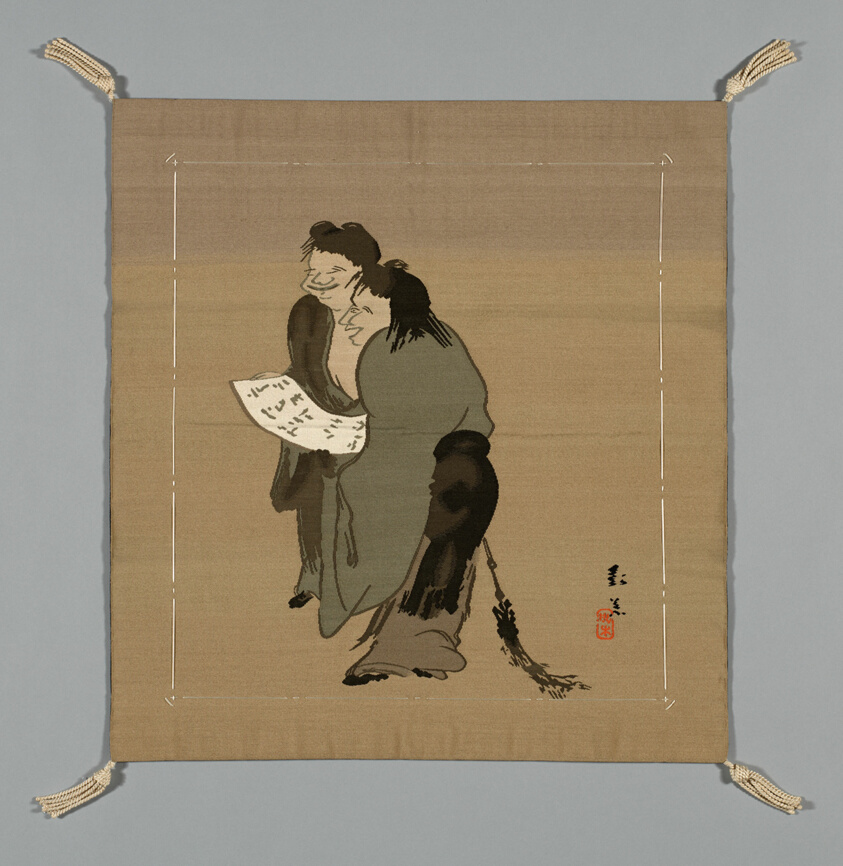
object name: Textile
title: Fukusa (Gift Cover)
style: late edo, meiji, edo (japanese period), Japanism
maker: Japan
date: late Edo period (1789–1868)/ Meiji period (1868–1912), 19th century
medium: Woven in one piece (hikikaeshi); mon side: silk, slit and single dovetailed tapestry weave (tsuzure); patterned side: silk, slit and single dovetailed tapestry weave (tsuzure); controlling stitches: silk, running “controlling stitches” along all edges; corners: silk, knotted fringe tassels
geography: Japan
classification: textile; weaving